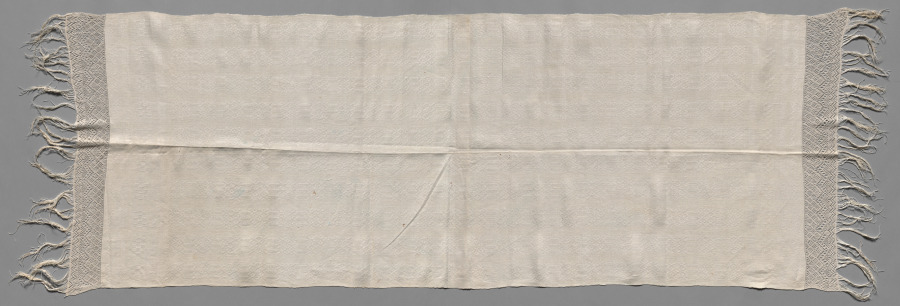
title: Towel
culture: Spain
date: 1900–1920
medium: Linen: patterned plain weave with knotted lace (macramé)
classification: Textile